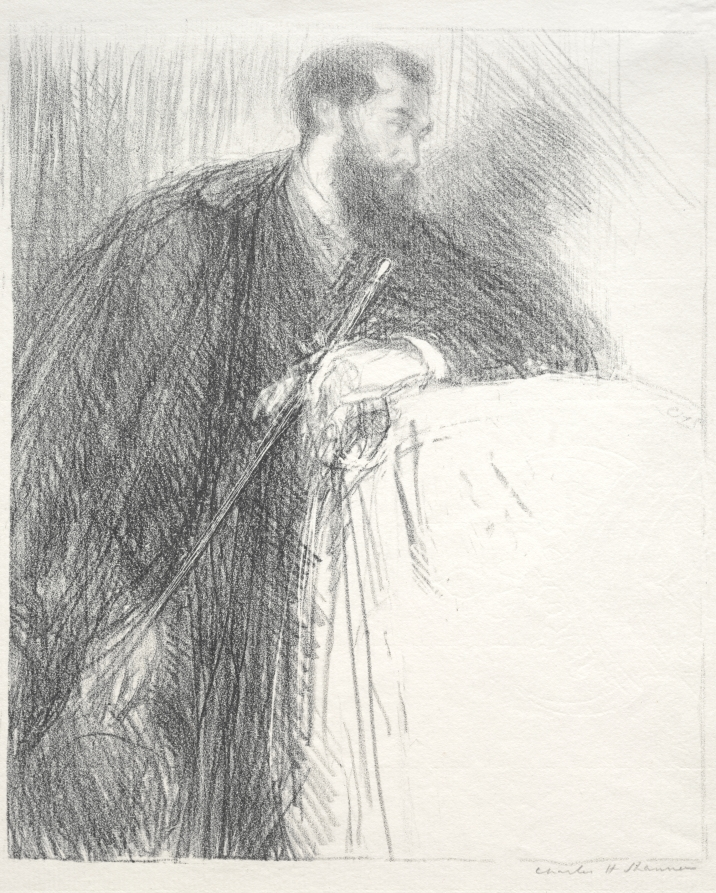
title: Lucien Pissarro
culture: England, late 19th Century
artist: Charles Hasslewood Shannon (British, 1863–1937)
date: 1895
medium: lithograph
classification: Print